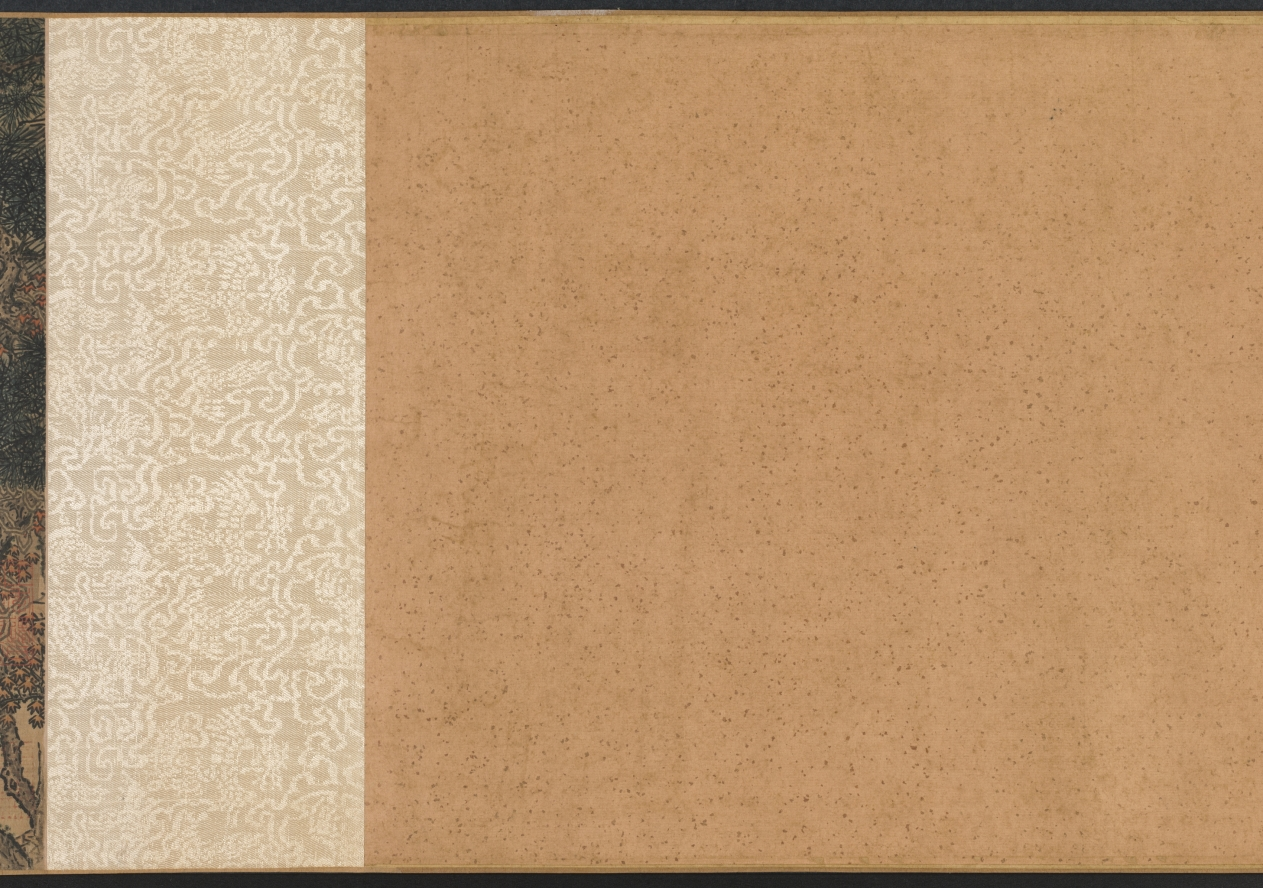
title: The Nine Elders of the Mountain of Fragrance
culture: China, Ming dynasty (1368–1644)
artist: attributed to Xie Huan (Chinese, c. 1370-c.1450)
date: 1426–52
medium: handscroll, ink and color on silk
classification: Painting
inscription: 4 seals: 2 of Xiang Yuanbian 項元汴 (1525–1590); 1 of the Qianlong Emperor (r. 1736-95); 1 of C. C. Wang 王季遷 (1907–2003)